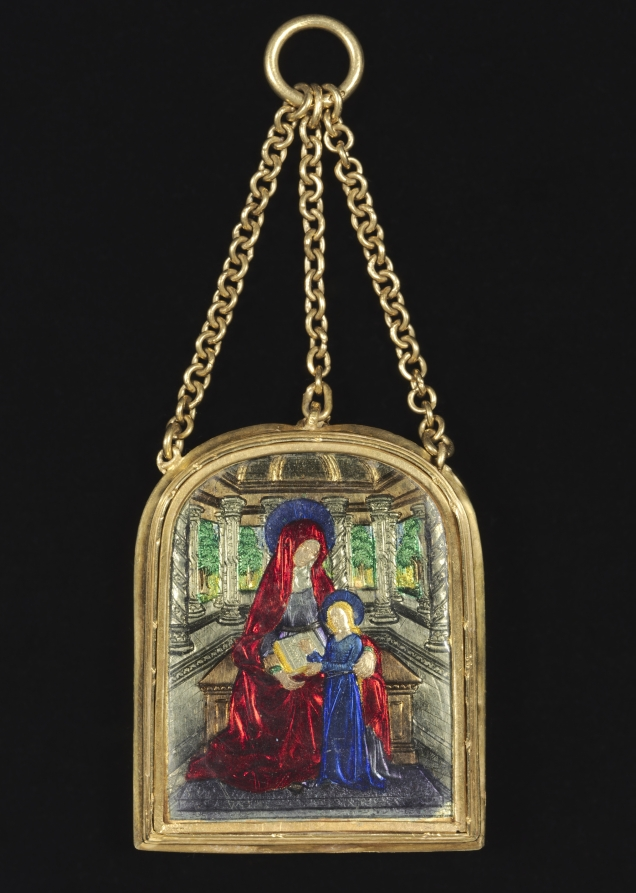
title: Pendant Triptych with an Onyx Cameo of the Nativity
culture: Pendant: France, Paris or Tours; Cameo: Italy, 13th-15th century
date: c. 1460–1500; cameo: c. 1250–1300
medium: basse-taille enamel on gold; onyx cameo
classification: Enamel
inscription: on the outside shutters, the two Prophets hold scrolls with inscriptions on them.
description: This pendant consists of colorful translucent enamel over an incised gold ground, a technique known as basse-taille, which simulates stained glass. For its owner this pendant was both for private devotion and a deluxe accessory. Made to be worn around the neck or suspended on a bed curtain, the pendant is shaped as a miniature triptych (three-panel painting) with wings or shutters that could be opened and closed. The outer surfaces are decorated with two prophets. The remaining images include various scenes from the life of Christ. Small objects played a key role in private piety. Within this domain of personal spirituality, images were used to venerate and invoke Christ and his saints, as well as to meditate on the most important mysteries of faith or events from the story of salvation. Pious men and women began outfitting rooms in their homes where "one can pray well." Small portable deluxe objects such as ivories, enamel plaques, and jeweled pendants were critical ingredients in this experience of faith.